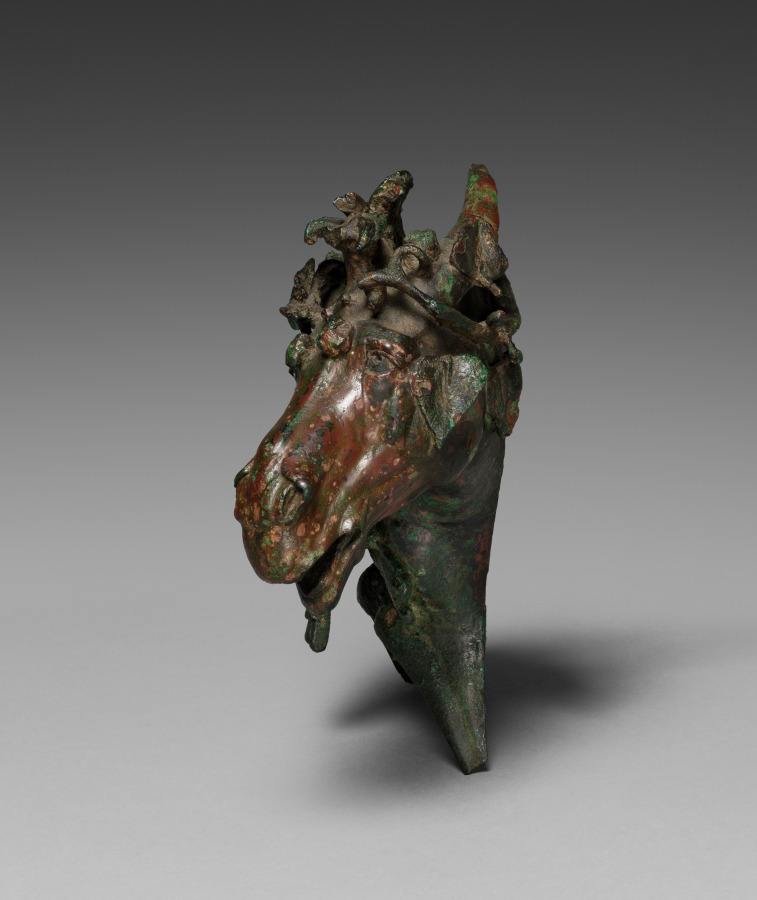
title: Mule-Head Attachment for a Couch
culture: Greece, Hellenistic period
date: 200–100 BCE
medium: bronze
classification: Sculpture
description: This bronze attachment in the shape of a mule’s head was once part of a fulcrum (armrest) for a banqueting couch. The mule’s mane flies upward, its mouth open and its ears pushed back against its head. The mule wears an ivy garland and a saddlecloth made from panther skin, two elements associated with the wine god Dionysos.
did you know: The pattern on the panther skin, called a meander, was also extremely popular on Greek pottery.